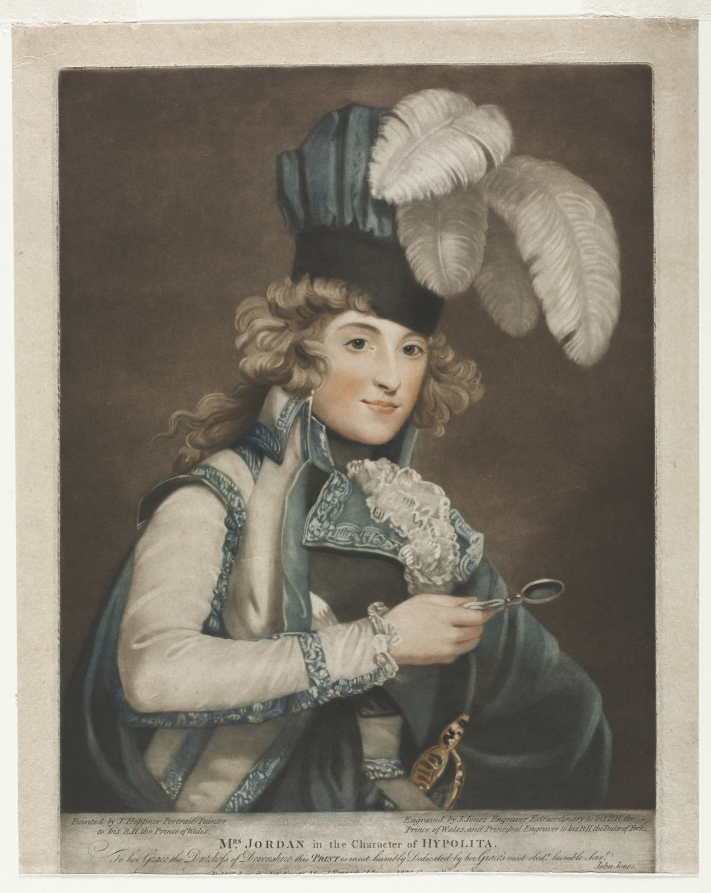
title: Dorothy Jordan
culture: England, 18th century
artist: John Jones (British, c. 1745–1797)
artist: after John Hoppner (British, 1758–1810)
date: 1791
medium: color mezzotint and etching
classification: Print